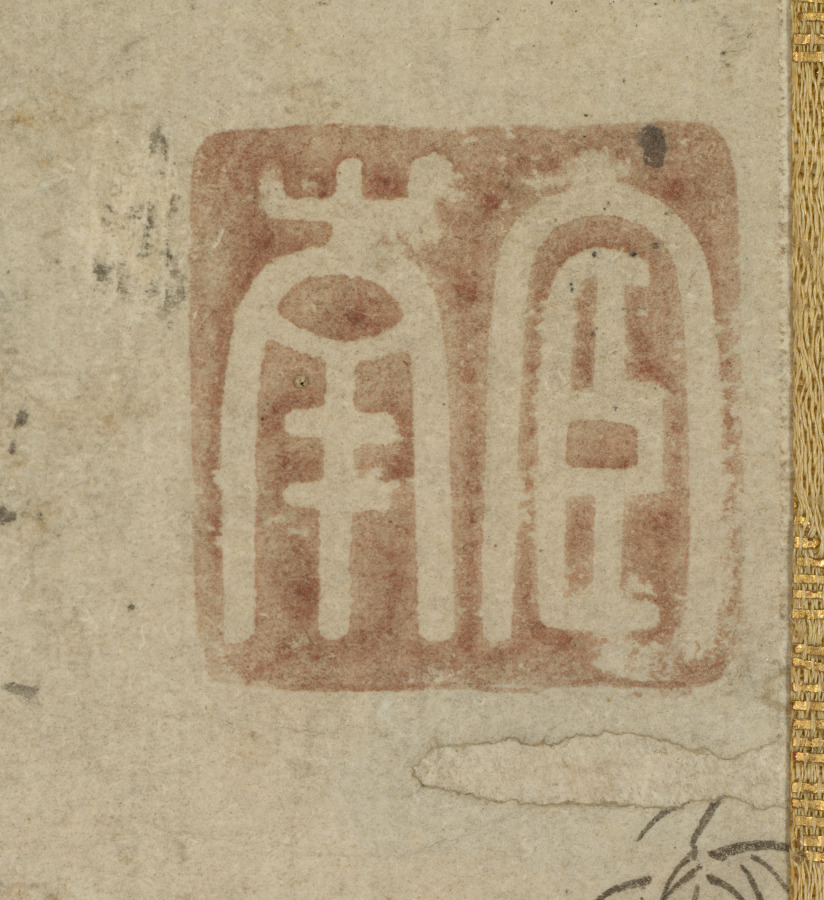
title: Figure Mooring a Boat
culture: Japan, Muromachi period (1392–1573)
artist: Kannan (Japanese, active mid-1500s)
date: mid-1500s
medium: hanging scroll, ink on paper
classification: Painting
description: Kannan is a little-known painter of the Kanto region. Close inspection of this quiet scene suggests that it represents the “night rain over Xiao and Xiang” scene from the Eight Views of the Xiao and Xiang Rivers. The style of the painting is similar to some works from Korea; as Japanese and Korean monk-painters traveled back and forth between one another’s monastic communities during the 1400s and 1500s, Kannan surely had the opportunity to consider incorporating Korean stylistic features into his work.